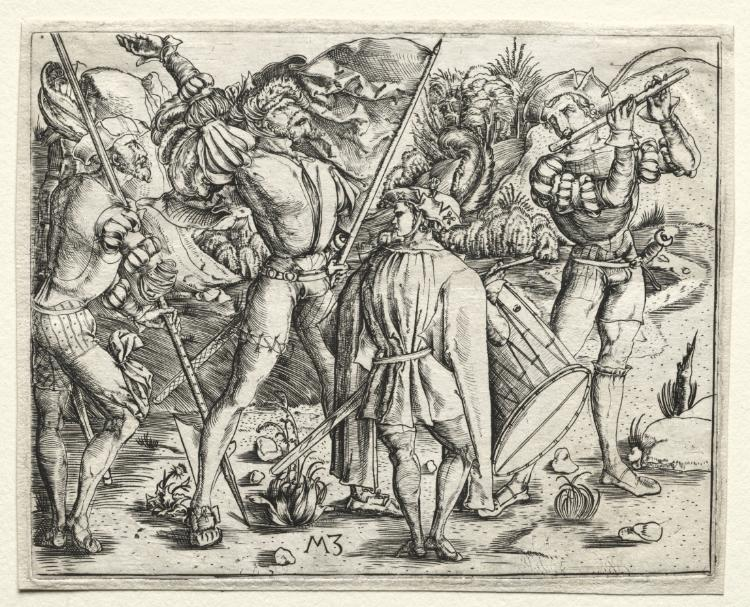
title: Four Soldiers and Military Band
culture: Germany, early 16th Century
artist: Master MZ (German)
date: 1500–03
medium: engraving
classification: Print